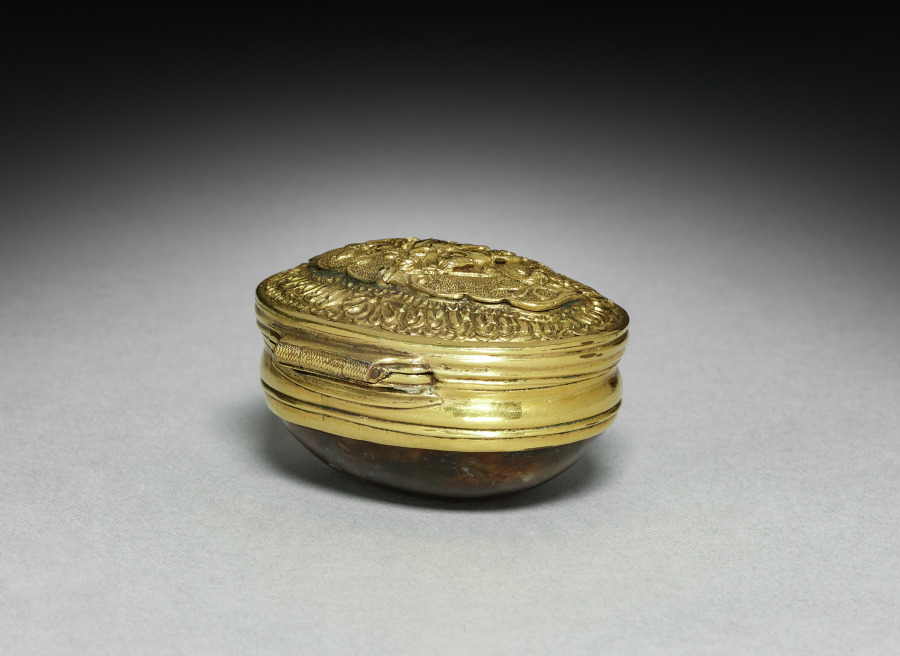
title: Box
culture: Germany, 18th century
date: 1730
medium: agate and gold or gilt metal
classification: Miscellaneous